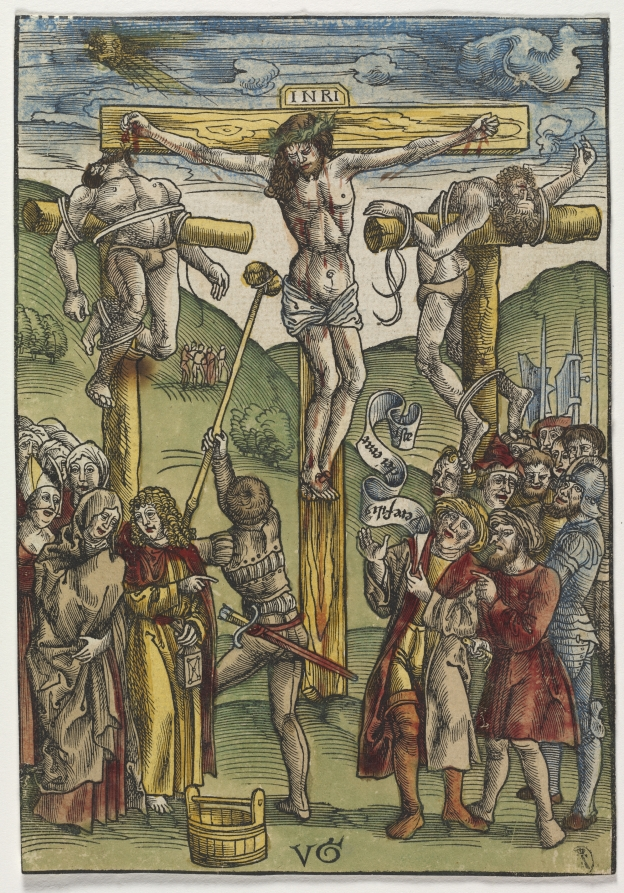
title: The Passion: The Crucifixion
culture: Switzerland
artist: Urs Graf the Elder (Swiss, c. 1485–1527/29)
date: before 1508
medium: woodcut with hand coloring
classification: Print